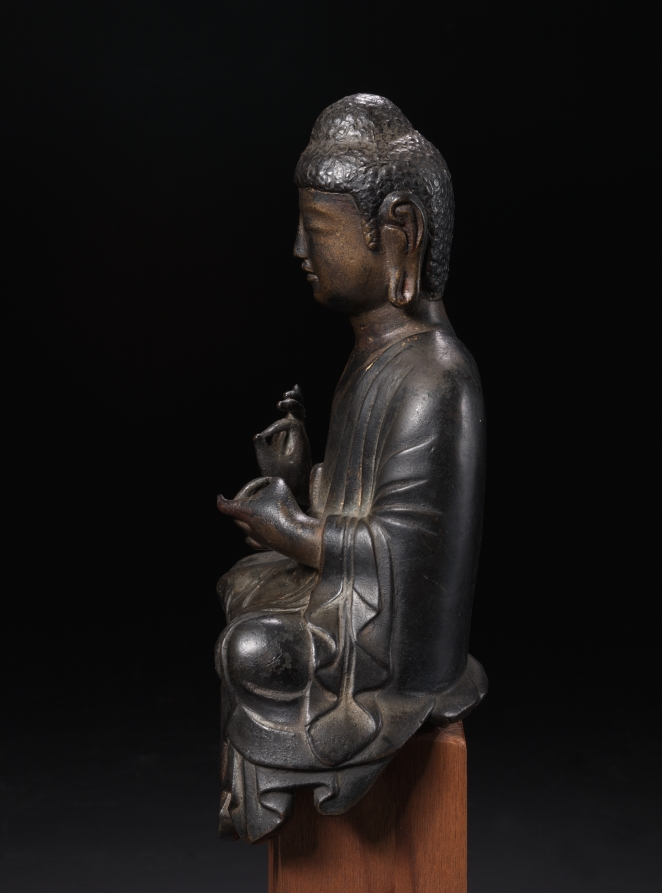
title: A Preaching Buddha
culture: Japan, Nara period (710–94)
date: 700s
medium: bronze with traces of gilt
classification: Sculpture